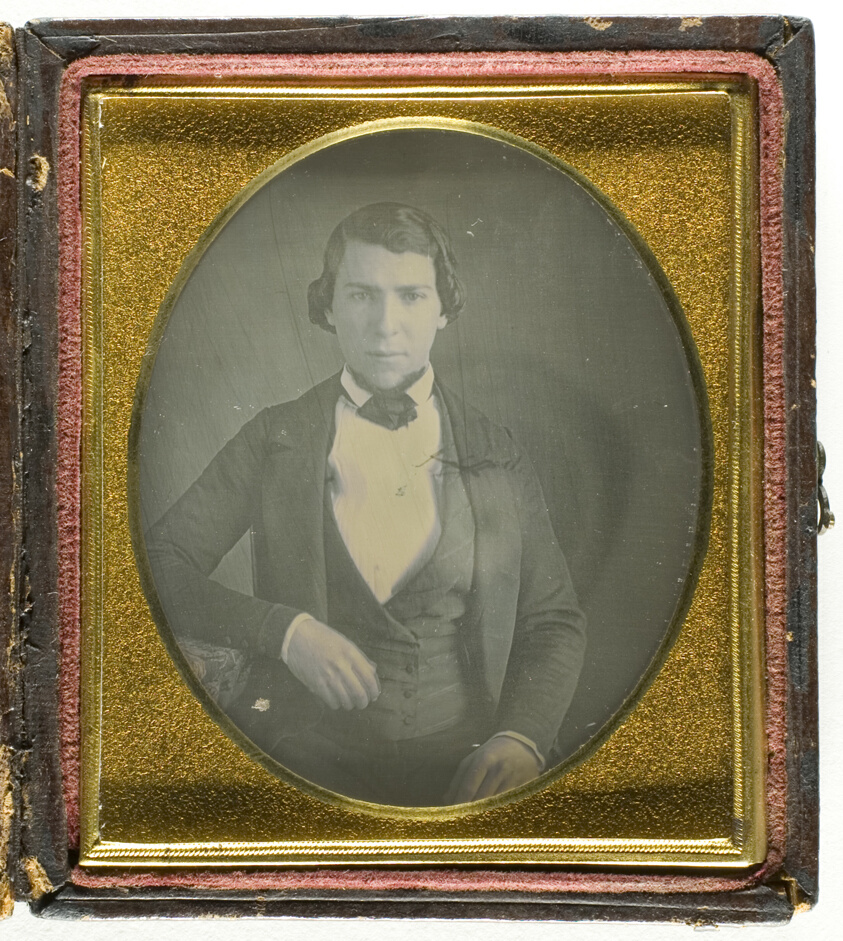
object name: Photograph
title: Untitled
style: 19th century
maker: Artist unknown; 19th century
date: 1839/60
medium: Daguerreotype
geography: Unknown Place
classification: daguerreotype; photographic process; photography; photograph